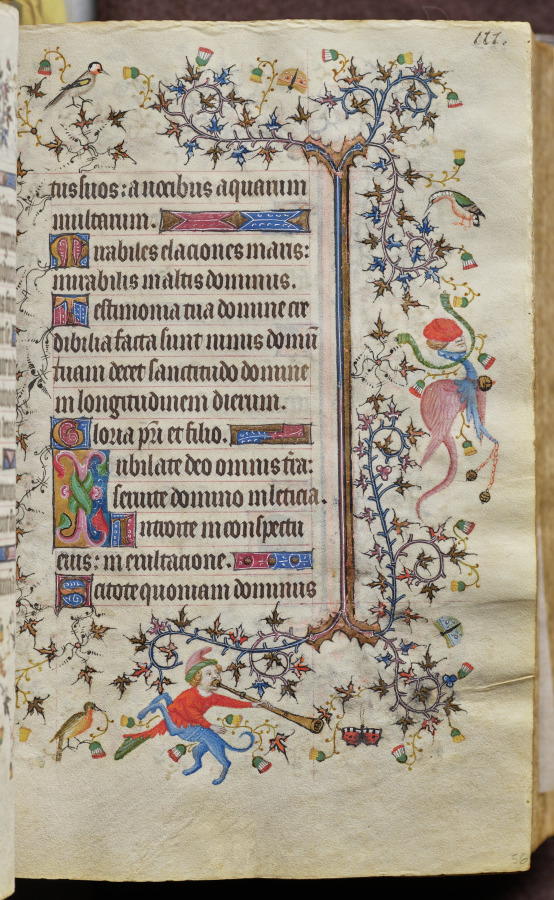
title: Hours of Charles the Noble, King of Navarre (1361-1425): fol. 56r, Text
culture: France, Paris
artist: Master of the Brussels Initials and Associates (French)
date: c. 1405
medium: ink, tempera, and gold on vellum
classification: Bound Volume